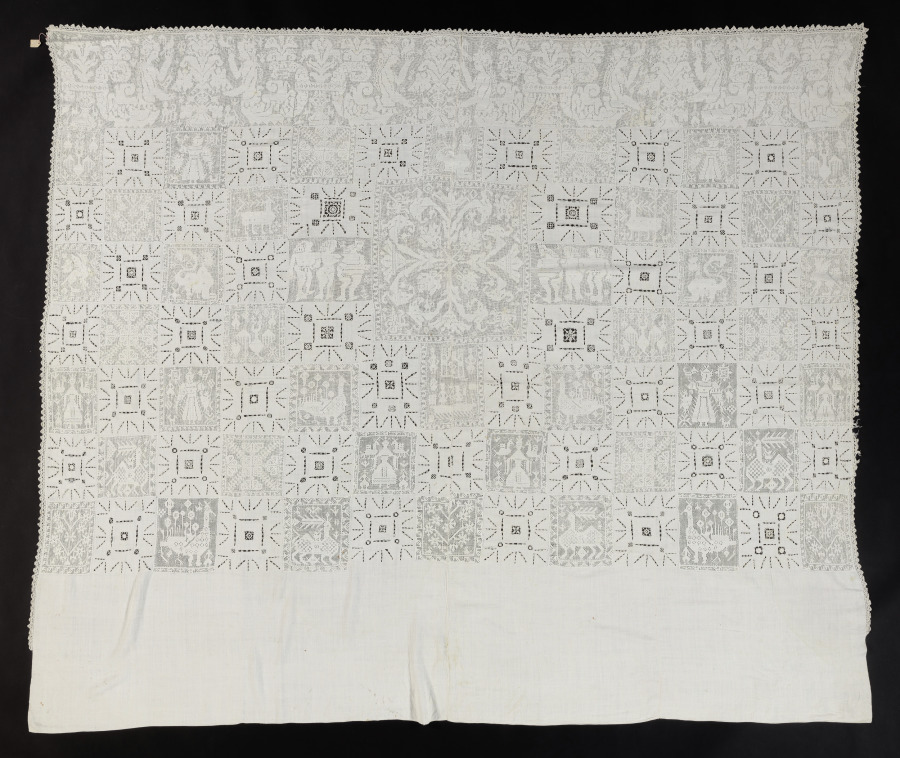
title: Lace Cloth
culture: Italy, 1700s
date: 1700s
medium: Linen: needle lace (cutwork and drawnwork) and bobbin lace edging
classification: Lace